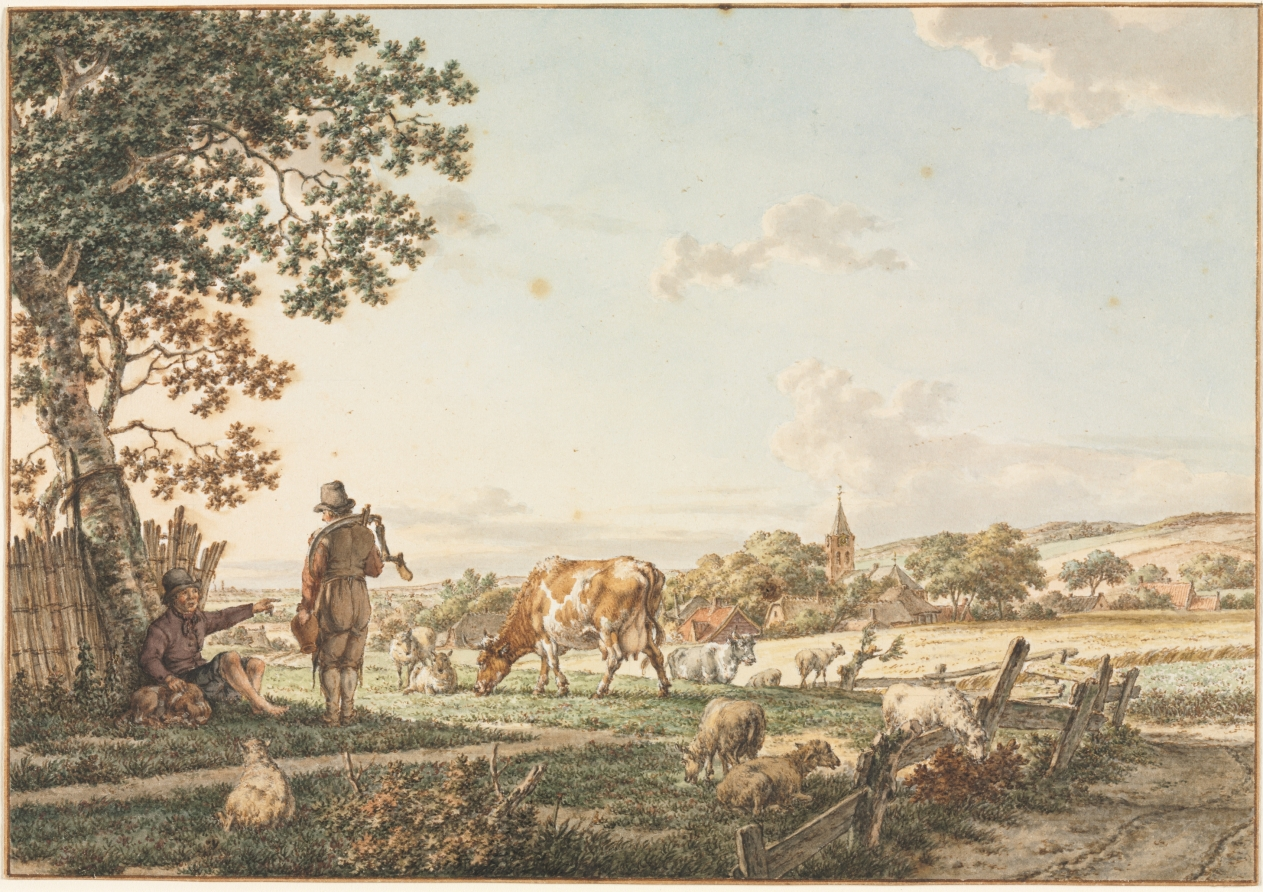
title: Pastoral Landscape with Village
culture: Netherlands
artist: Jacob Cats (Dutch, 1741–1799)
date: 1799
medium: watercolor, point of brush and watercolor, and pen and brown ink over black chalk; framing lines in brown ink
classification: Drawing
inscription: VERSO, through transmitted light, lower left, in ink: J. Cats inv et fecit [17?]99 ; upper left, in ink(?): 32 97 1/2 ; center, in ink(?): N° 65 [sideways]; VERSO OF SECONDARY SUPPORT, lower left, in graphite: Jacob Cats [erased] [illegible, erased] / 1[79?]9 [erased]